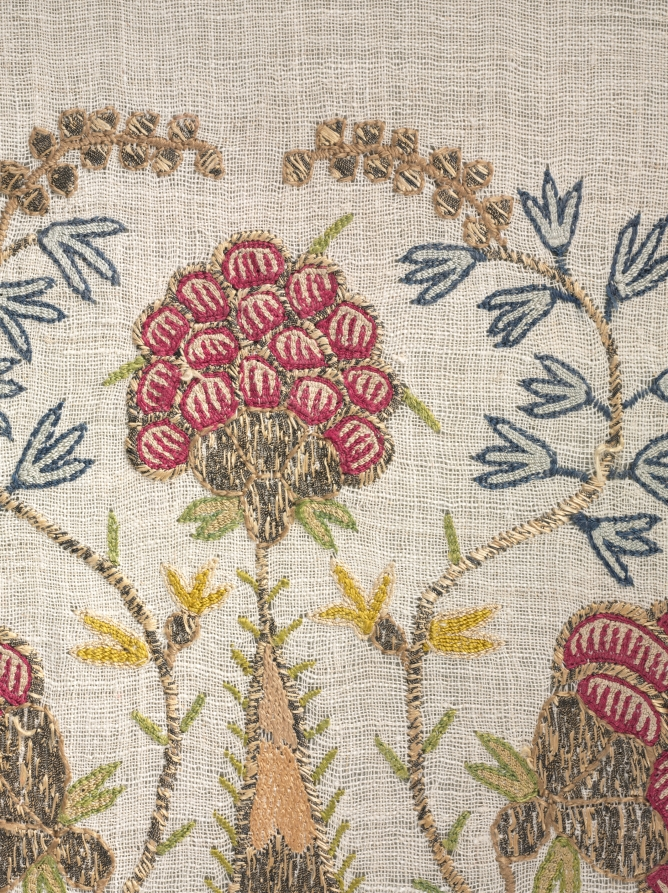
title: Embroidered Sash (Uckur)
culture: Turkey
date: 1700s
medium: embroidery: silk and silver filé on linen tabby ground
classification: Embroidery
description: Each end of the sash is embroidered with a single motif of large-scale flowering plants. Below the main motif is a stylized foliate device forming a narrow border.